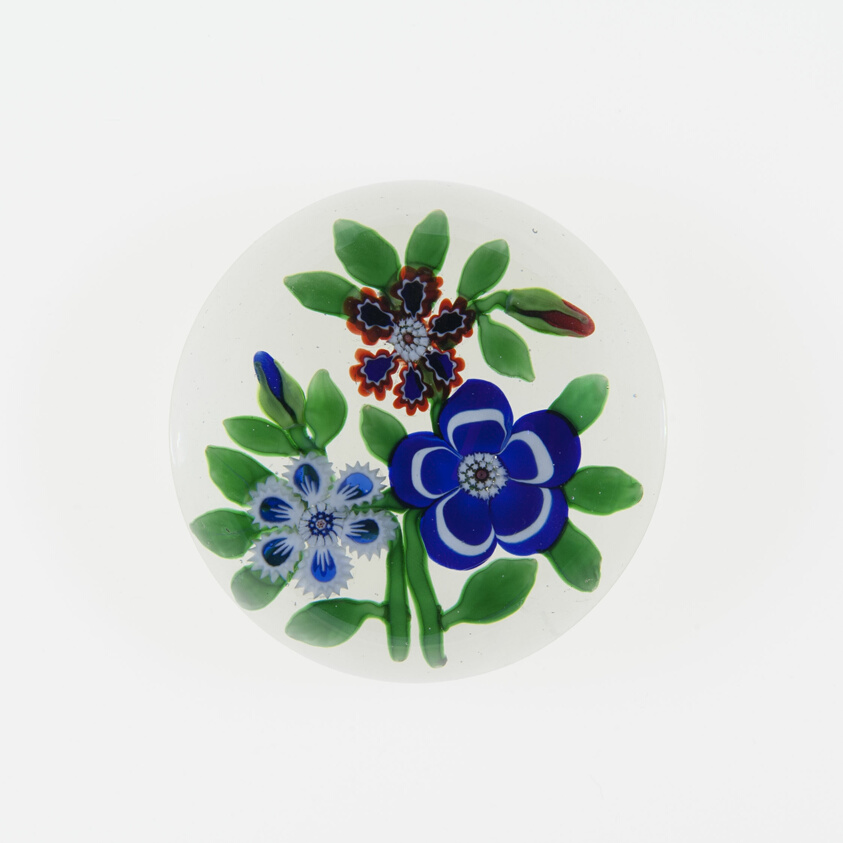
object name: Glass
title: Paperweight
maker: Baccarat Glassworks (Cristalleries de Baccarat); Lorraine, France, founded 1764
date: 19th century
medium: Glass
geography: Lunéville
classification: paperweight; lampwork; european decorative arts; glass